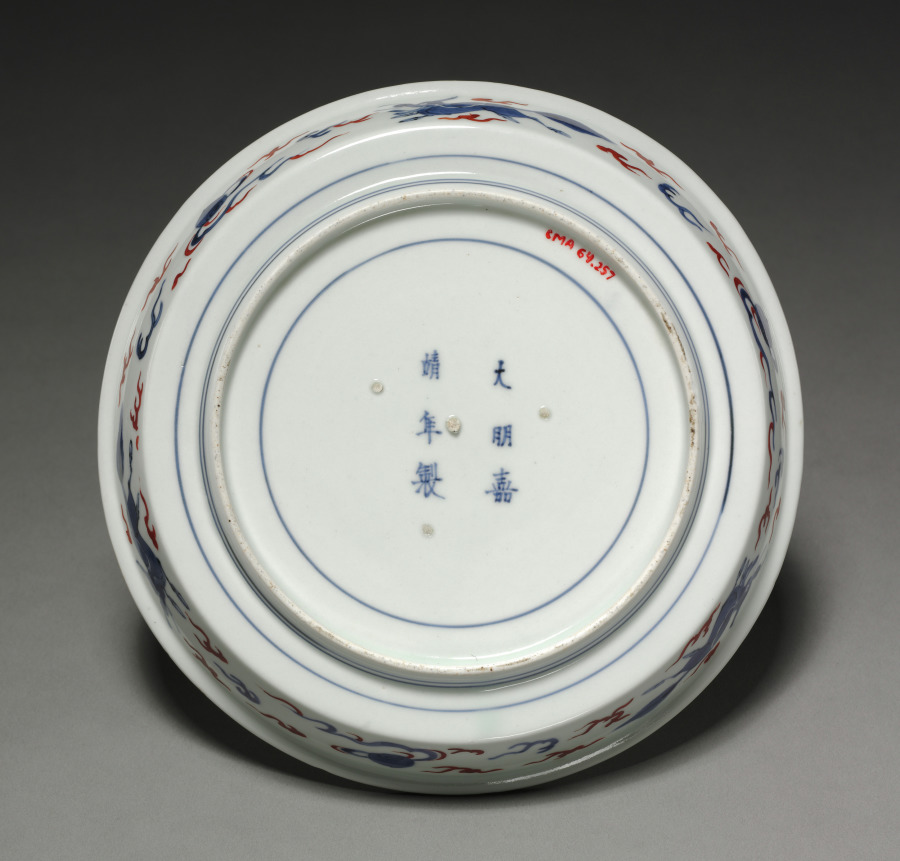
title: Dish with Figures in a Chinese Garden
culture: Japan, Edo period (1615–1868)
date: 1700s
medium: Porcelain with underglaze blue and overglaze color enamel and gold, with iron oxide rim (Arita ware)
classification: Ceramic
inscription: 長憶湖江南三月裏、鷓鴣啼処百花香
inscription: 大明嘉靖年製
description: This dish is inscribed with a poem from The Gateless Gate, a text compiled by Chinese Chan (Zen) master Wumen Huikai (1183–1260). The verse reads, “I always remember the spring in Jiangnan. Where the partridges sing; how fragrant the countless flowers!”